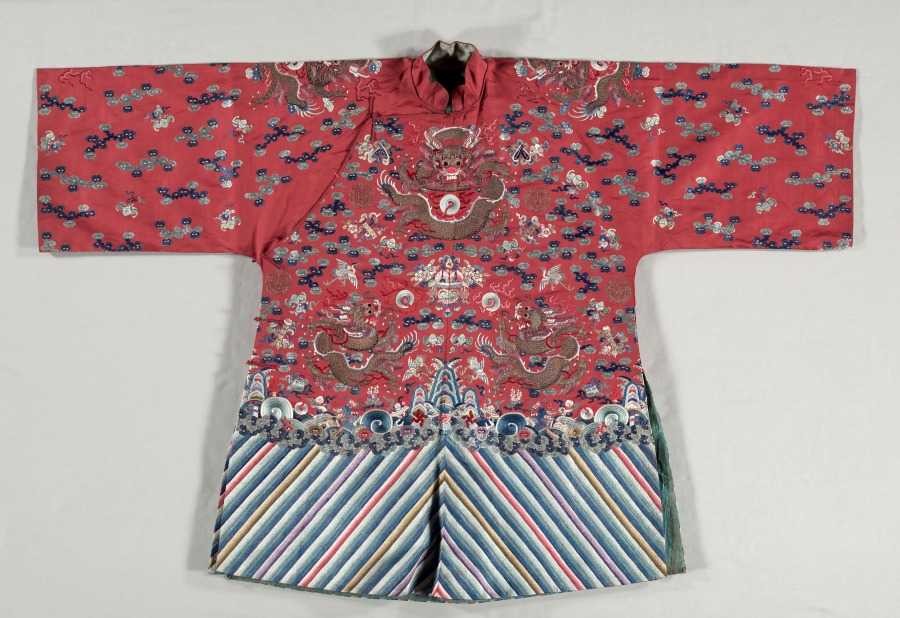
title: Woman's Bridal Dress: Dragon Jacket, Pleated Skirt, Tabard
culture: China, Qing dynasty (1644-1911)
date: 1800s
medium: Silk, gilt-metal thread; embroidery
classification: Garment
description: This three-piece bridal dress includes a dragon jacket, a pleated skirt, and a tabard, a short loose-fitting sleeveless vest. The ensemble reveals the high rank of her husband even though it did not fall under the scope of the Qing Dynasty sumptuary laws. The woman's bridal trousseau contains a short red coat with side-fastening and wide sleeves. It is decorated with ten dragons and other cosmological motifs commonly found on court dress. The presence of ten dragons indicates that the wife's husband was a high-ranking official. The dragon jacket was worn over a pleated turquoise skirt, with six embroidered panels which feature dragons in the front and back. A three-quarter-length sleeveless tabard completes the outfit, with a front closure, open sides secured by cloth bands, and a colorful tasseled fringe around the hem. Dragons, water, and clouds are embroidered on the silk ground. In addition, a rank badge applied on the front and back shows that the bride married a man of high official rank.